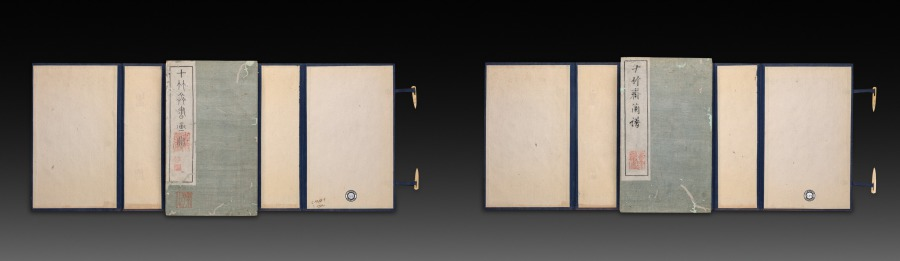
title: Ten Bamboo Studio Collection of Calligraphy and Painting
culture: China, Qing dynasty (1644–1911)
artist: Hu Zhengyan (Chinese, c. 1584–1674)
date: 1633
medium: Woodblock-printed book; ink and colors on paper; first edition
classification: Print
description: Color printing reached a level of perfection in the early 1600s, as seen in this Ten Bamboo Studio Collection of Calligraphy and Painting and the Mustard Seed Garden Manual of Painting (printed 1679 and 1701). The painterly quality, precision in registering (aligning) the woodblocks, and harmonious colors made them the most successful color print editions in Chinese history. Both editions were printed and compiled in Nanjing, spread nationwide, and had a great impact on the arts in Japan and Korea.